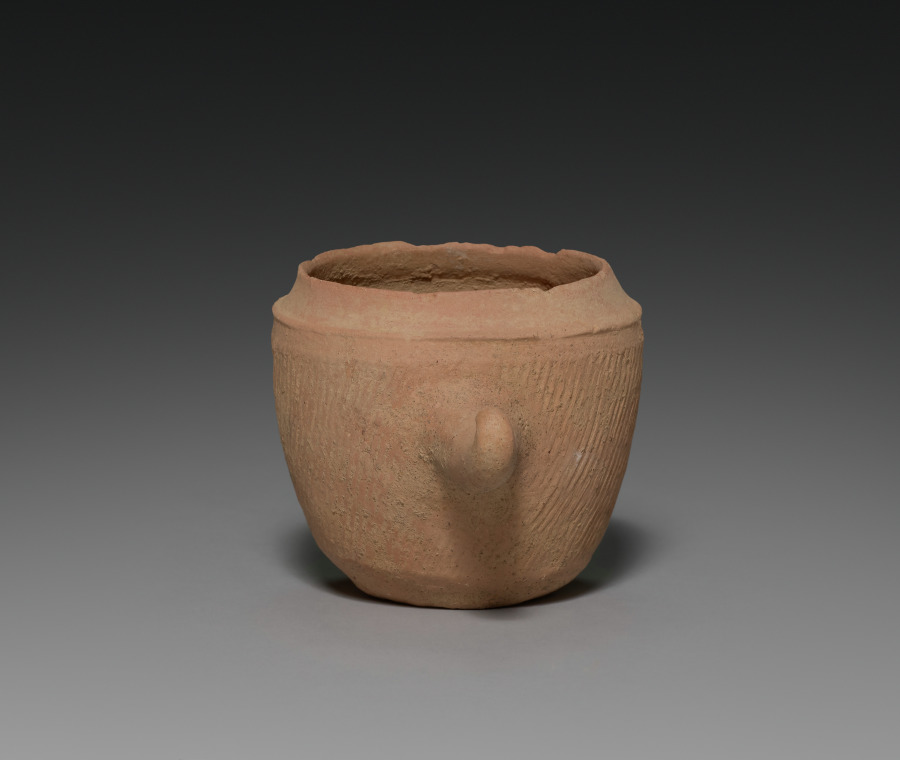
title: Covered Jar with Horn Handle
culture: Korea, Silla (57 BC-935) or Kaya (AD 42-562) period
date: 400s–500s CE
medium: red earthenware with impressed designs and applied red slip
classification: Ceramic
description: Early earthenware from the Three Kingdoms period (57 BCE–668 CE) became widely utilized as agriculture and religion grew to be essential elements in sustaining society and its systems. The clay jars of different sizes and shapes on display were made for the following purposes: some were used to store harvested grains and seeds, some, especially lidded ones such as this example, to preserve cremated remains, and some to serve offerings in rituals.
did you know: Closed kilns built on hillsides became widely used for producing this type of pottery vessel in Korea during the Three Kingdoms period.